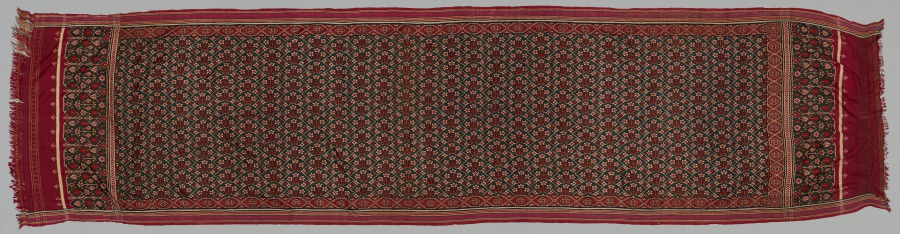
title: Silk Patolu Sari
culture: India, Gujarat, 19th century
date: 1800s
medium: tabby weave, double ikat; silk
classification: Textile